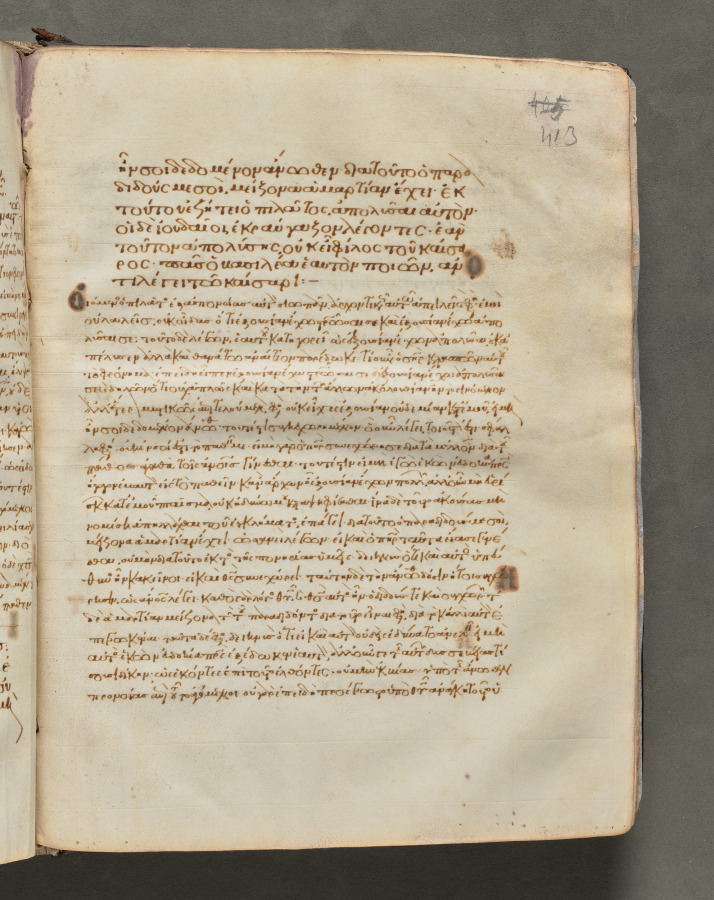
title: Text, folio 413 (recto), from a Gospel Book with Commentaries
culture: Byzantium, Constantinople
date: c. 1000–1100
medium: ink, tempera, and gold on vellum; leather binding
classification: Bound Volume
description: Each of the four gospels in this book opens on a page with brilliantly illuminated borders depicting the author of the text as well as birds—principally peacocks, symbols of the immortality of the soul—and fountains, representing the fountain of life and the salvation of the soul. This volume consists of 428 leaves with texts in Greek. Its level of sophistication suggests that it was probably written and decorated in a monastery in Constantinople.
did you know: Gospel books were carried in procession through Byzantine churches.